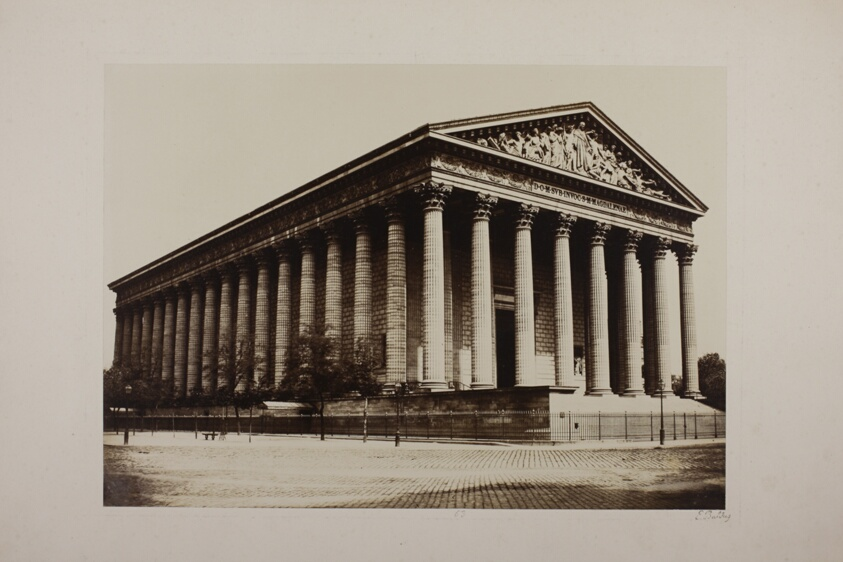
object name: Photograph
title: Church of the Madeleine (Eglise de la Madeleine)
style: 19th century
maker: Édouard Baldus; French, born Germany, 1813–1889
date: c. 1860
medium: Albumen print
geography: France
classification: photograph; albumen silver print; photography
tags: Paris